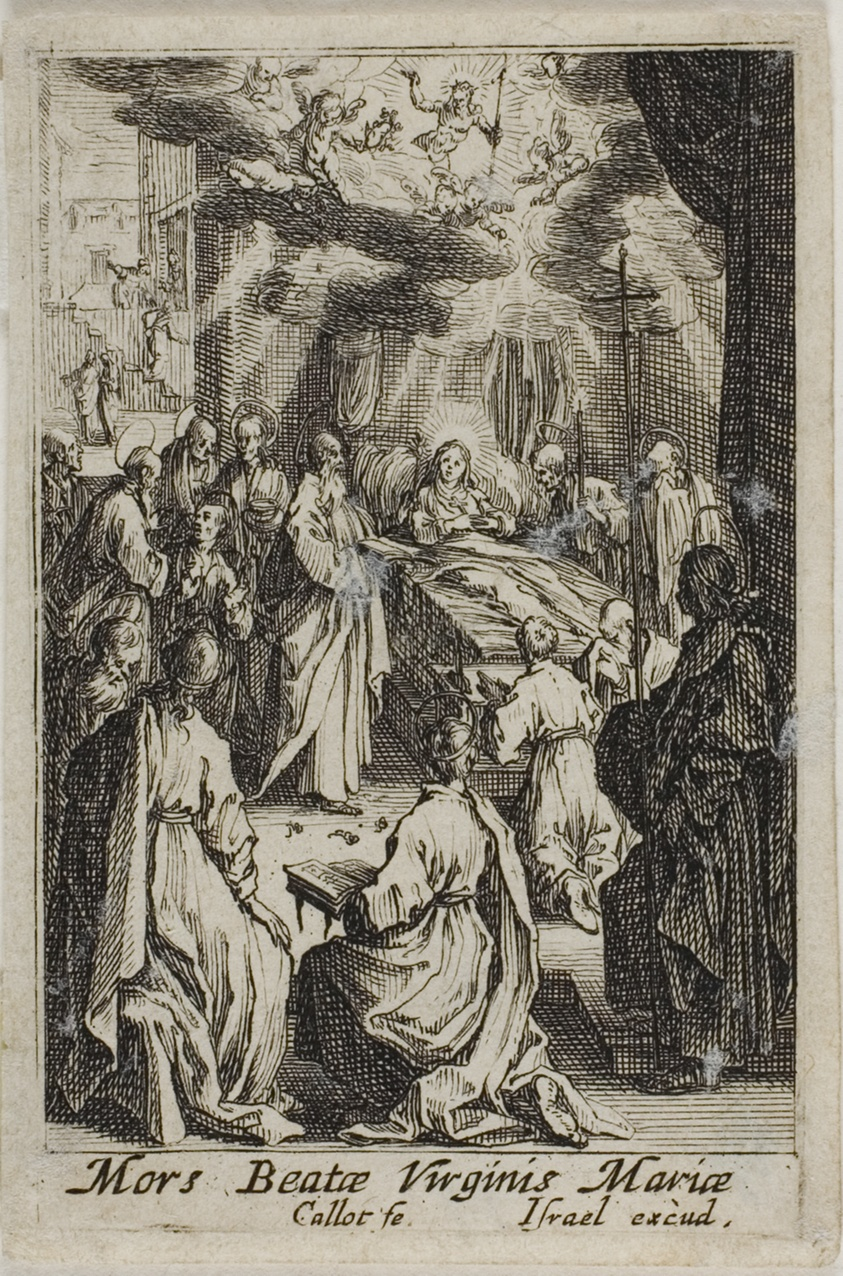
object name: Print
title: The Death of the Virgin Mary, from The Life of the Virgin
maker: Jacques Callot (French, 1592-1635)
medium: Etching on paper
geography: France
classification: etching; print; prints and drawing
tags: Virgin Mary, Christian subjects, mythology, prints and drawings